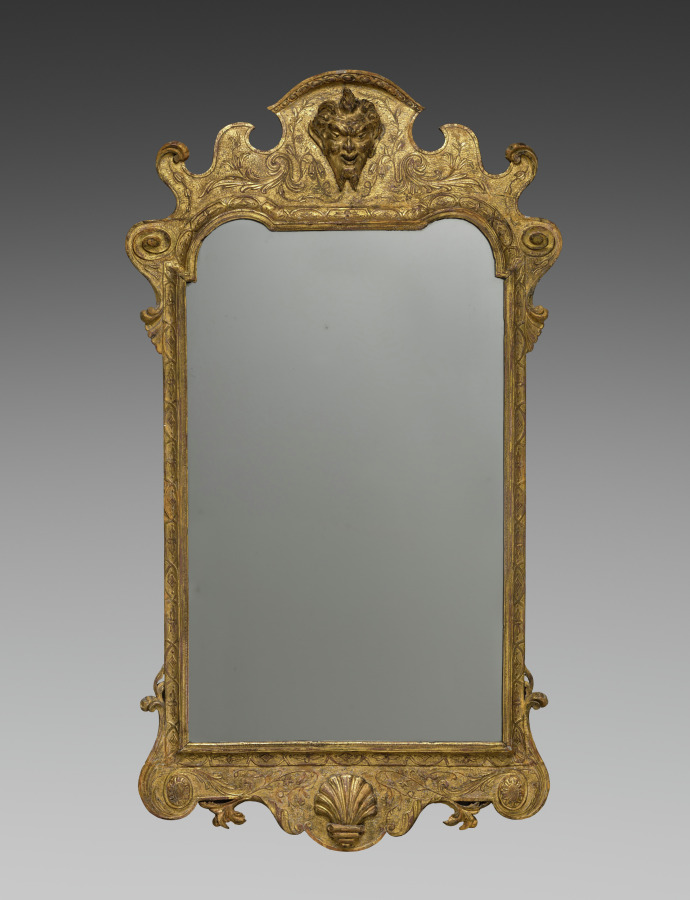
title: Mirror Frame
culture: England, early 18th century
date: c. 1710–20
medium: wood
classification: Furniture and woodwork